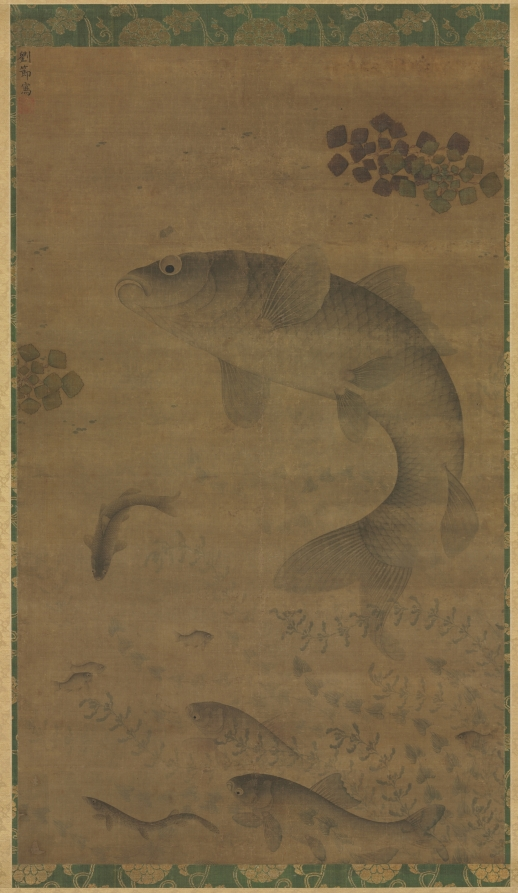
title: Leaping Carp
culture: China, Ming dynasty (1368–1644)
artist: Liu Jie (Chinese, c. 1447–1520s)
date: 1368–1644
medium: hanging scroll, ink and color on silk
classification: Painting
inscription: Artist's signature and seal: Written by Liu Jie 劉節寫. [seal] Chin-i-chih-hui chih chang.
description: With a fine ink line and graded wash, the life-like depiction of these swiftly moving carp is representative of the high quality of works by Liu Jie, a Ming dynasty court painter known for his fish paintings. The artist’s signature and seal are in the painting’s top left corner. The carp is an auspicious and popular subject in Chinese painting. Here, the leaping carp can be associated with “a carp jumping the dragon gate,” which according to mythology transforms into a dragon, emblematic of a scholar’s success in passing the civil service examinations. Another reading suggests that this carp is not leaping but guiding his offspring in worshipping heaven.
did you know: The clusters of geometric leaves painted with mineral pigments are likely water caltrap.